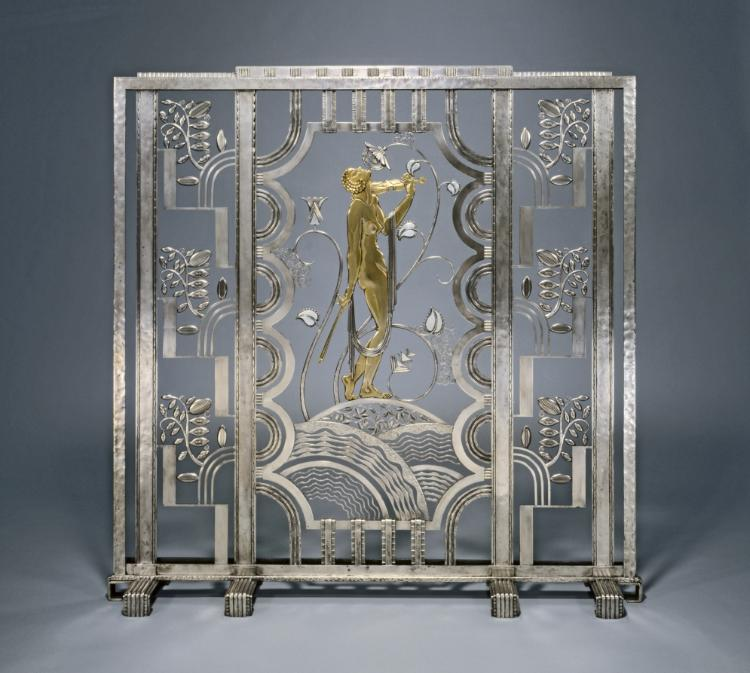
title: Muse with Violin Screen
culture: America, Ohio, Cleveland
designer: Paul Fehér (American, born Hungary, 1898–1990)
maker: Rose Iron Works (America, Ohio, Cleveland, est. 1904)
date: 1930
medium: Steel, brass; silver and gold plating, cotton velveteen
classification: Metalwork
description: Since the early years of the 20th century, the Rose Iron Works, a Cleveland supplier of architectural ornament, has produced distinguished metalwork. The company’s founder, Martin Rose, was born in Austria-Hungary and studied ornamental metalsmithing in Vienna prior to immigrating to Cleveland in 1902. In the 1920s, he hired a talented young Parisian designer, Paul Fehér, to work for the firm. Fehér’s designs, culminating in this massive screen, brought a modern European sensibility to the Rose Iron Works production. With its geometric patterning, highly stylized and abstracted natural forms, and the central figure reminiscent of the celebrated jazz singer Josephine Baker, this screen reflects the classic motifs of Art Deco design.